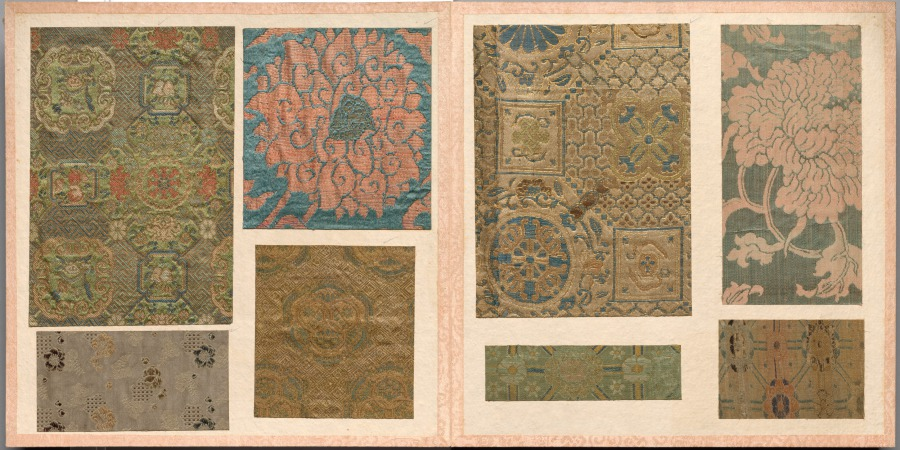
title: Album of Textile Samples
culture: Japan and China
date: 1700s–1800s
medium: silk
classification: Textile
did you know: This album contains 46 pages with 156 mounted Chinese or Japanese textile samples.